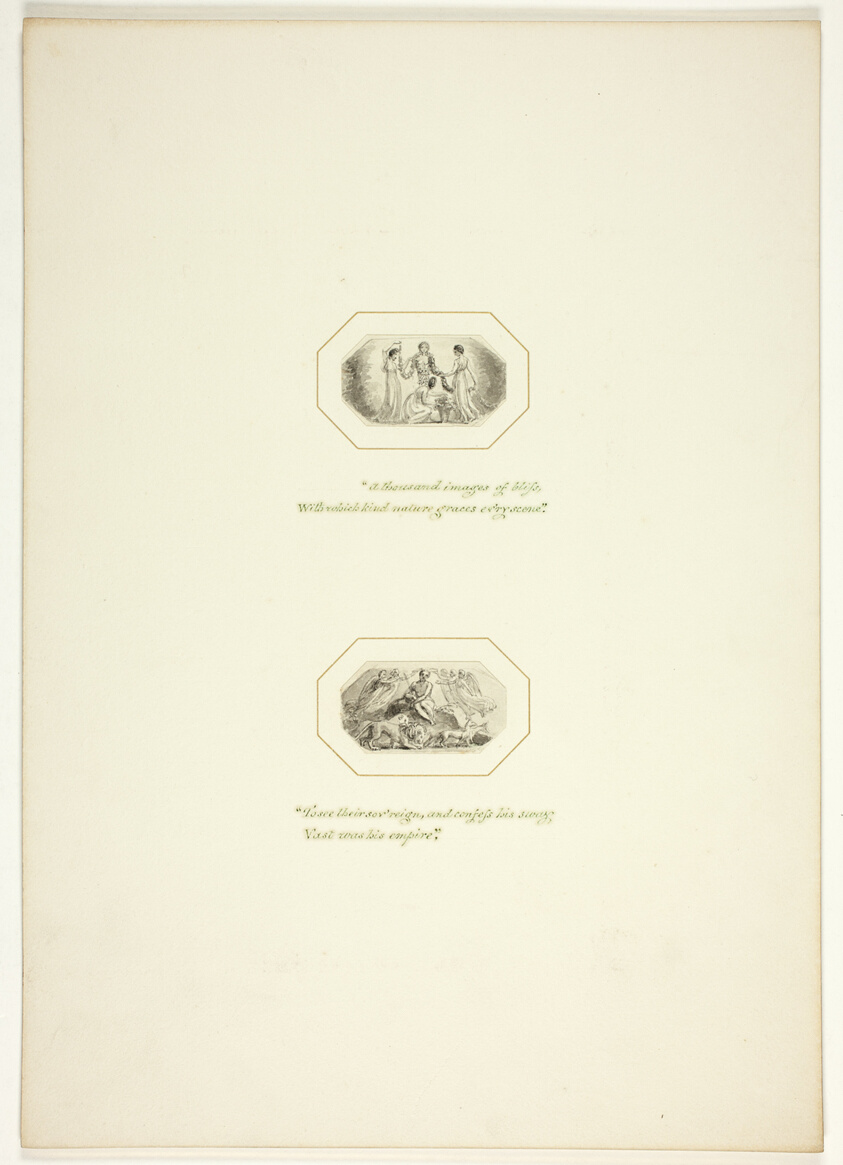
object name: Drawing and Watercolor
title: Study for a plate from The Task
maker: Thomas Stothard (English, 1755-1834)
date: c. 1800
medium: Ink wash on paper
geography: England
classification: ink or chalk wash; drawings (visual works); prints and drawing